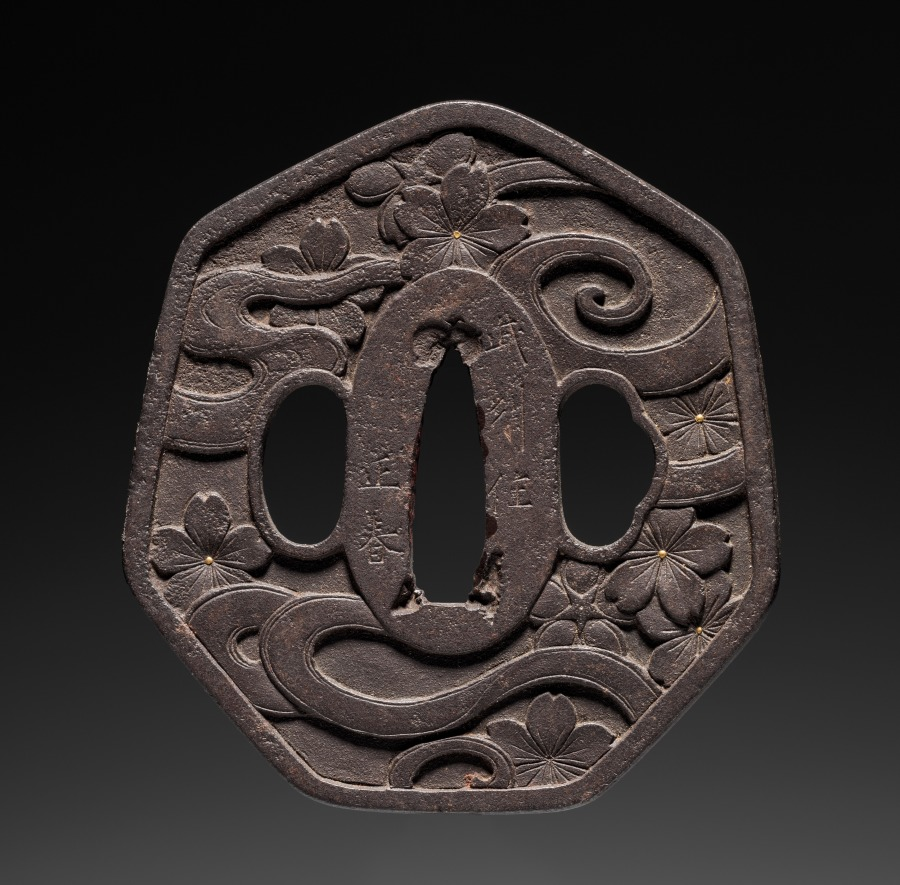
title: Sword Guard (Tsuba) with Cherry Blossoms on River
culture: Japan, possibly Edo period (1615-1868)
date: c. 1615–1868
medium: iron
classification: Arms and Armor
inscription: signed: 武州住正春